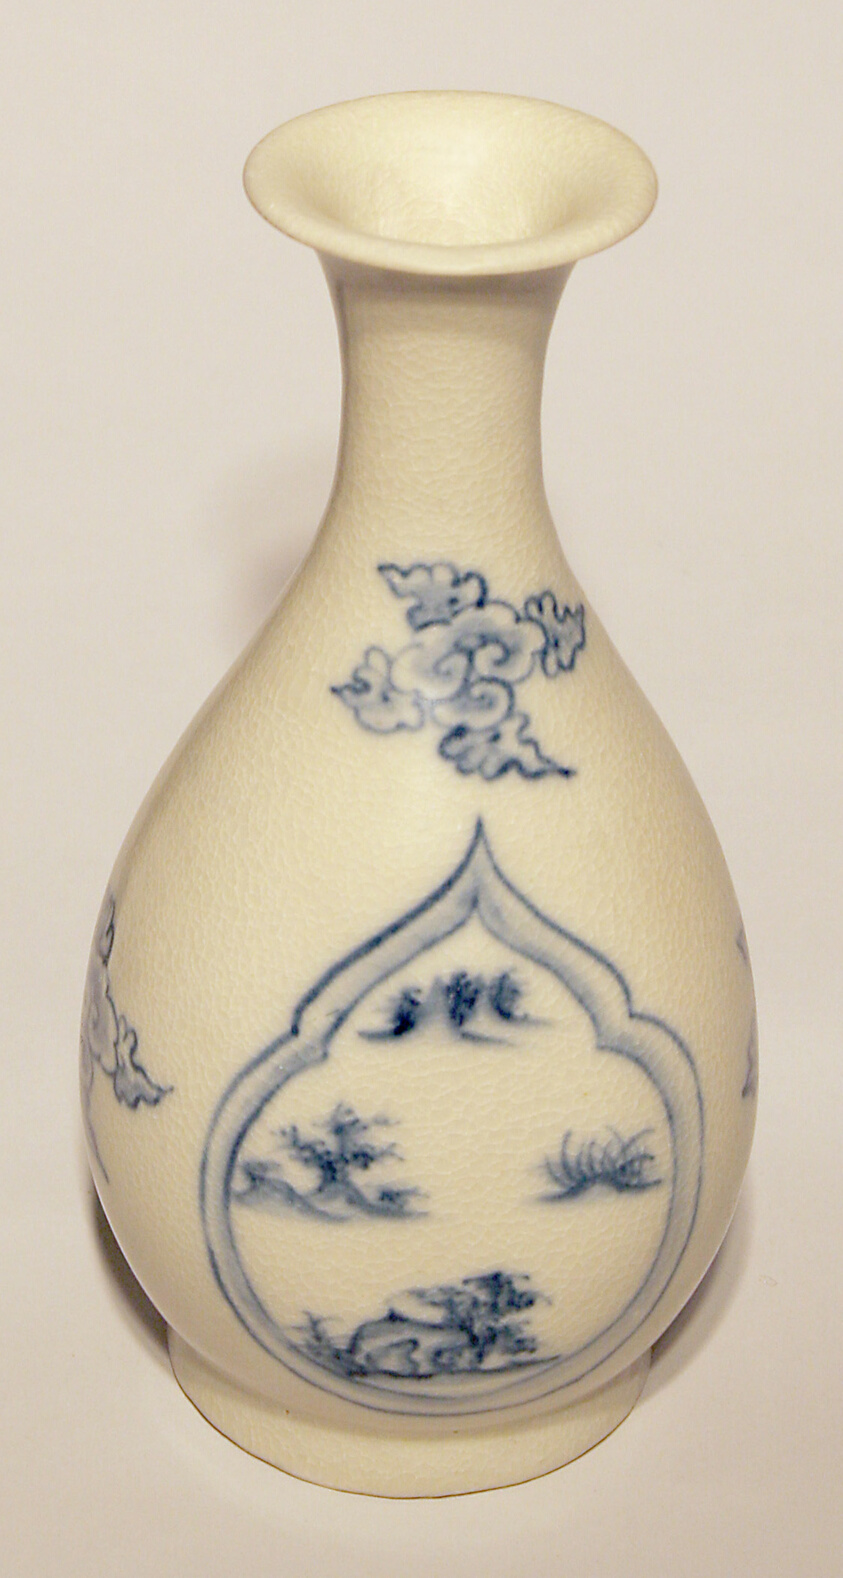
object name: Vessel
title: Pear-Shaped (Yuhuchun) Bottle with Everted Lip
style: Southeast Asian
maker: Vietnam; near Hoi An (offshore)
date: Late 15th/early 16th century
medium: Glazed stoneware with cobalt-blue underglaze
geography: Vietnam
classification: porcelain; vessel; bottle